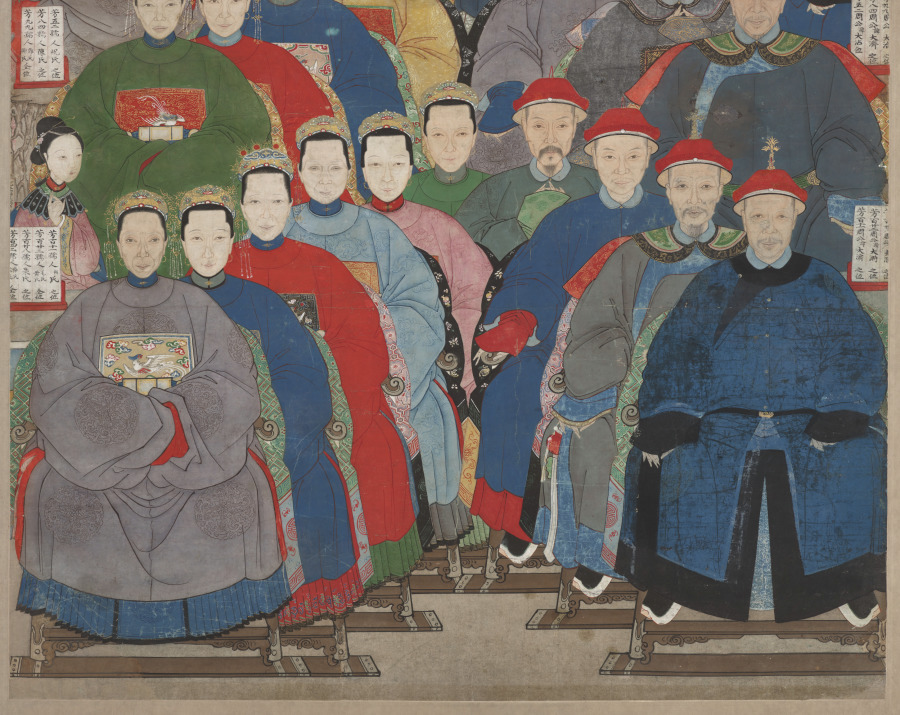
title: Ancestor Group Portrait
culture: China, Qing dynasty (1644-1911), Jiaqing period (1796-1820)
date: 1796–1820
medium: Hanging scroll; ink and color on paper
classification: Painting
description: From top to bottom this scroll features various generations of ancestors with men on the right and women on the left, 30 figures altogether. Inscribed tablets give their rank and relation within the family. Square badges on their robes indicate each figure's rank as an official. Scrolls of this type were displayed for worship at home during the New Year celebrations.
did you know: Court officials' wives could wear the same rank badge as their spouses.